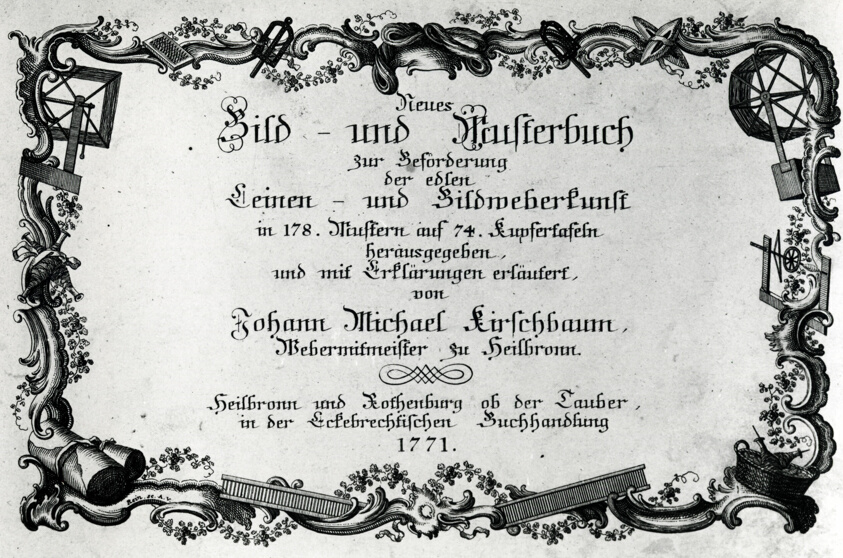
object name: Book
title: Neues Bild-und Musterbuch (New Picture and Sample Book)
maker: Johann Michael Kirschbaum (German, active c. 1771); Germany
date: 1771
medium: Paper; printed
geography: Germany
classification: textile; book; accessories (object genre); sample books